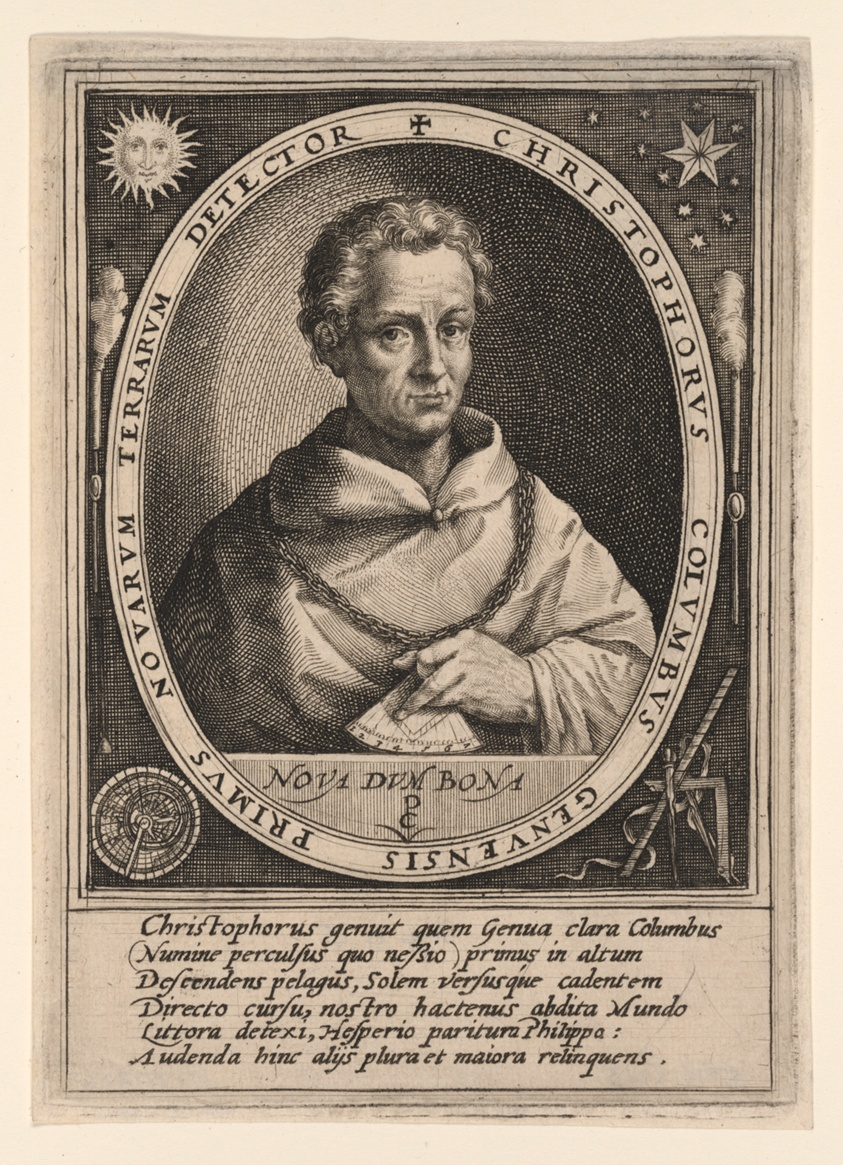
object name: Print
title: Christopher Columbus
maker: Crispijn van de Passe I; Dutch, c. 1565–1637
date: 1590/98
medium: Engraving on paper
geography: Netherlands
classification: engraving; paper; print; prints and drawing